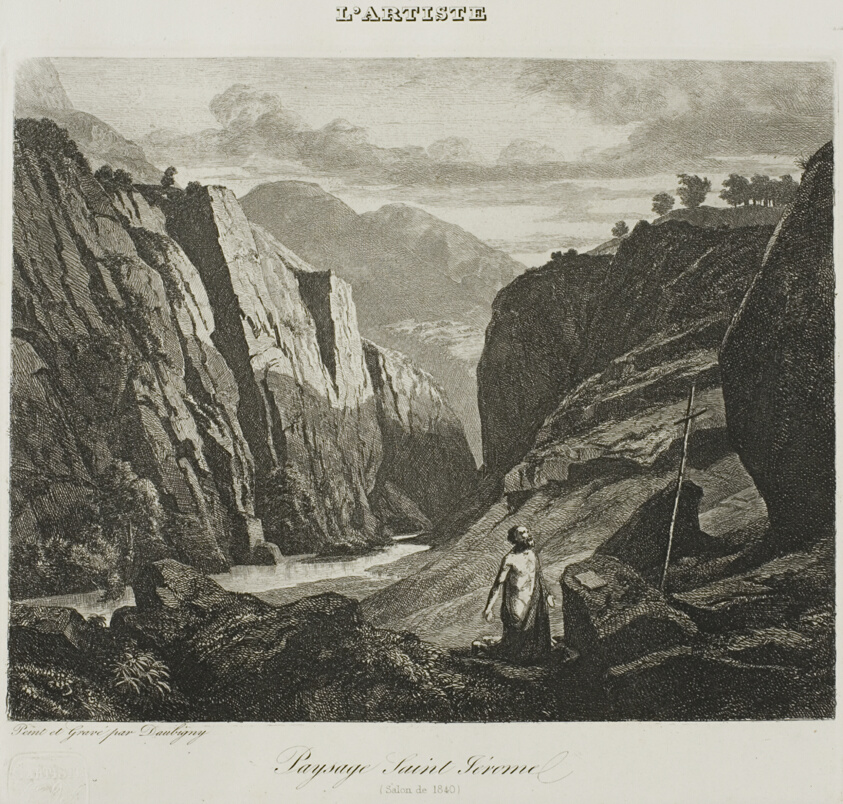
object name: Print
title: Saint Jerome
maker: Charles François Daubigny (French, 1817-1878)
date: 1840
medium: Etching on white wove paper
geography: France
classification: etching; print; prints and drawing